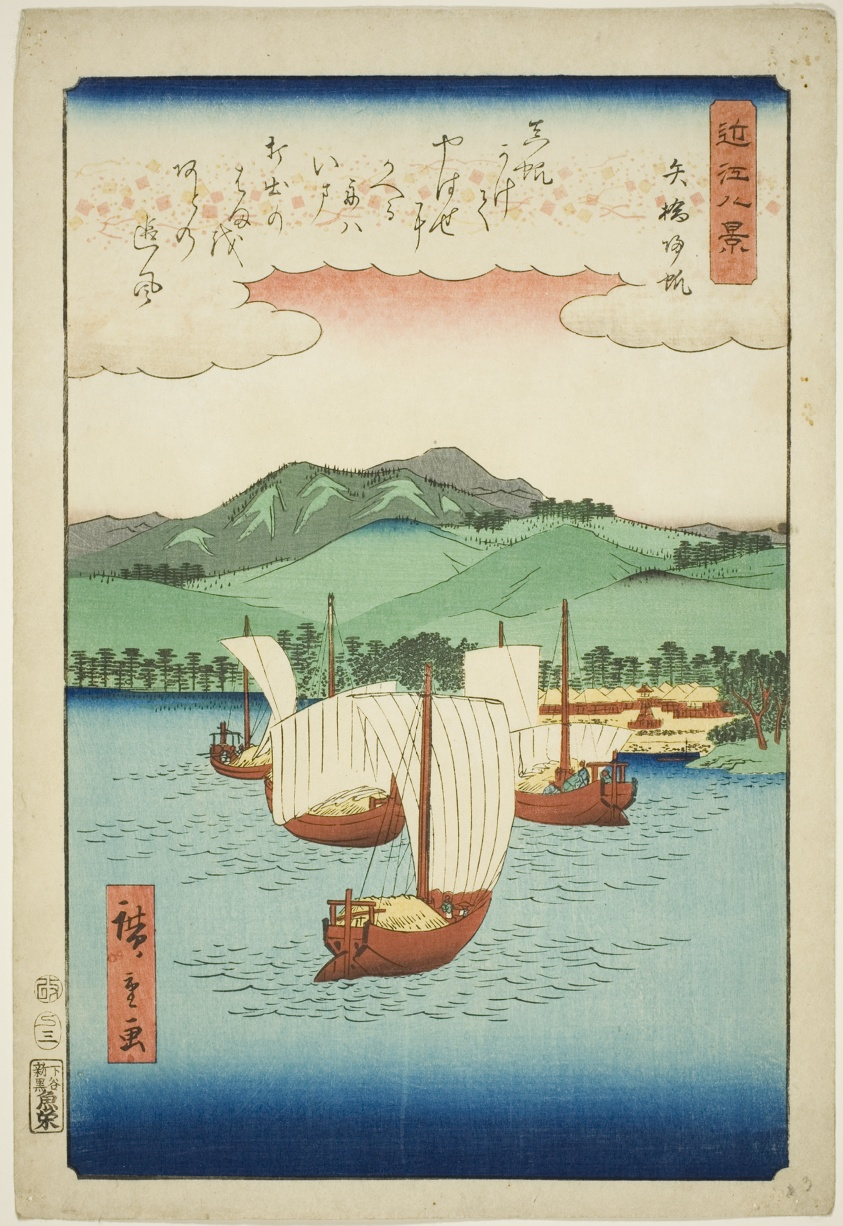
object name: Print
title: Returning Sails at Yabase (Yabase kihan), from the series "Eight Views of Omi (Omi hakkei)"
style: Japanese (culture or style)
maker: Utagawa Hiroshige 歌川 広重; Japanese, 1797-1858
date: 1857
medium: Color woodblock print; oban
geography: Japan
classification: woodblock print; print; asian art